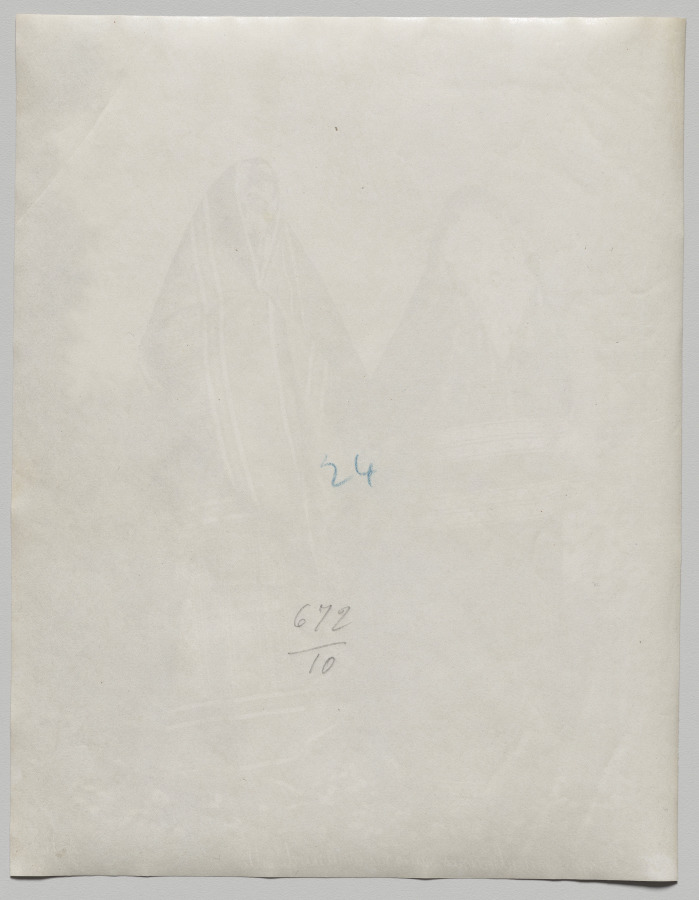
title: Femmes musulmanes Syriennes à Beyrouth, Costume de Ville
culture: France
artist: Félix Bonfils (French, 1831–1885)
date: c. 1867–78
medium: Albumen print from glass plate negative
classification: Photograph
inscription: Imprinted in white on recto of image: "672-Femmes musulmanes syriennes costume de ville"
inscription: Imprinted in white on recto of image, lower right: "Bonfils"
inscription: Written in blue pencil on verso: "24"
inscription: Written in pencil on verso: "672/10"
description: French photographer Félix Bonfils settled with his wife and child in Beirut in 1867 and opened a photography studio which his family continued to operate until 1918. Their offerings included landscapes and cityscapes, portraits, and posed scenes including examples of Middle Eastern dress such as this one, which shows the full-body and face veils worn in public by some, although not all, Muslim women in public in Beirut.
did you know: Many Westerners found the full veils worn by Muslim women in mid-nineteenth-century Beirut both fascinating and disturbing.